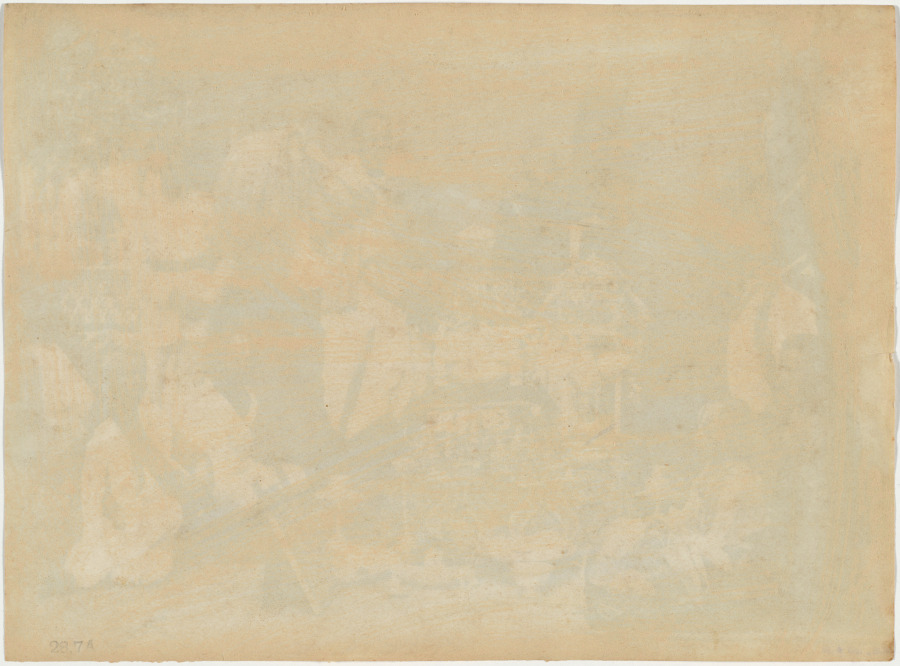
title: Maharaja of Rewa in Prayer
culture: India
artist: Raja Deen Dayal (Indian, 1844–1905)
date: 1886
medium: albumen print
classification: Photograph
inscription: Stamped in black ink on verso: “28.7A”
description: Performing religious devotions was part of a maharaja’s duty to protect his kingdom. Praying before an altar, the maharaja fingers prayer beads and sits opposite a mirror, an auspicious object in Hindu worship. The lines painted on the men’s foreheads indicatethat they are devotees of the Hindu god Vishnu. This group portrait demonstrates three ways rulers serve the state: by being a military commander, a worldly scholar, and, in this image, an observant Hindu.